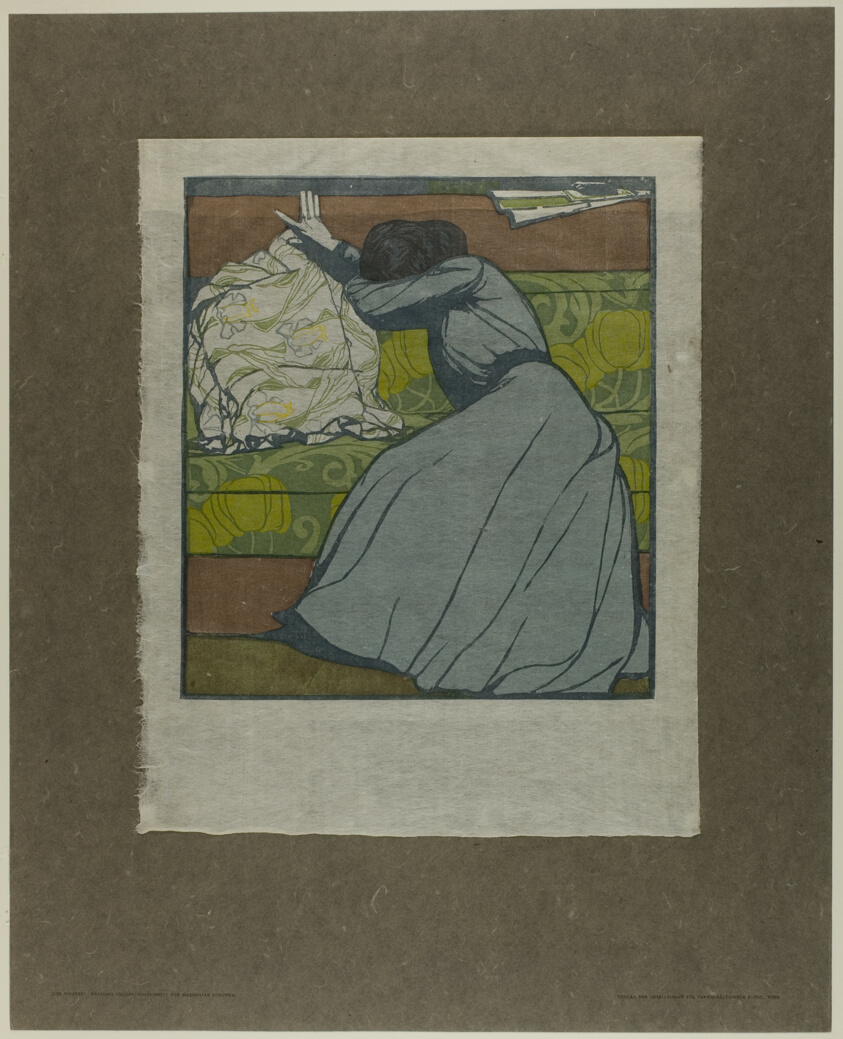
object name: Print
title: The Pillow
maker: Maximilian Kurzweil (Austrian, 1967-1916)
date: 1903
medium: Color woodcut on paper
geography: Austria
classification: print; prints and drawing